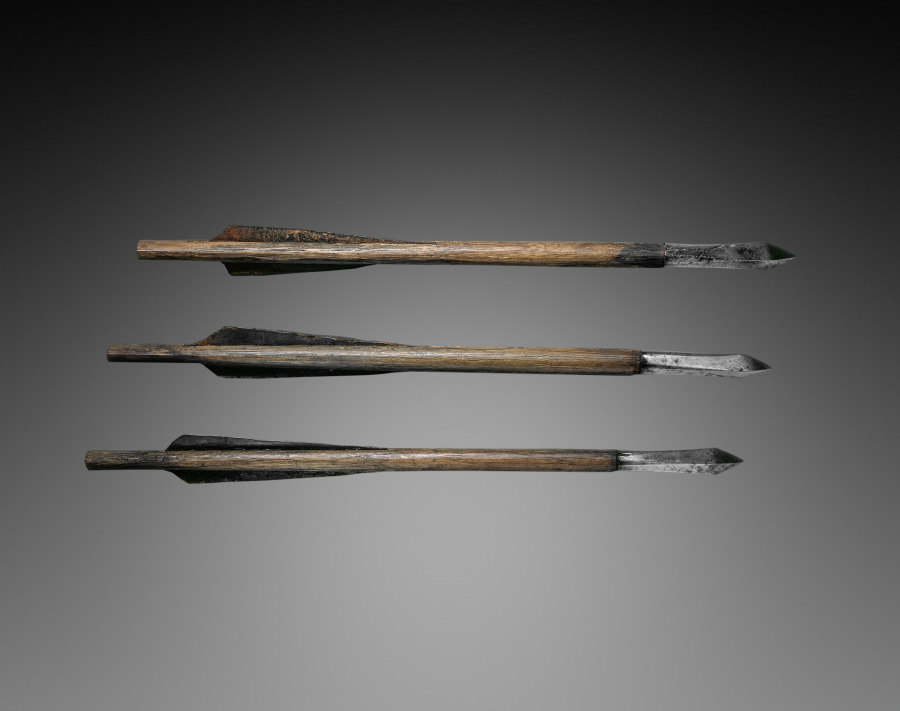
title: Crossbow Bolt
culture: Germany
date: 1500s–1600s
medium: wood, leather, steel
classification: Arms and Armor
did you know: Bolts with leather feathering were used mainly in the Tyrolean area which, includes northern Italy and western Austria.